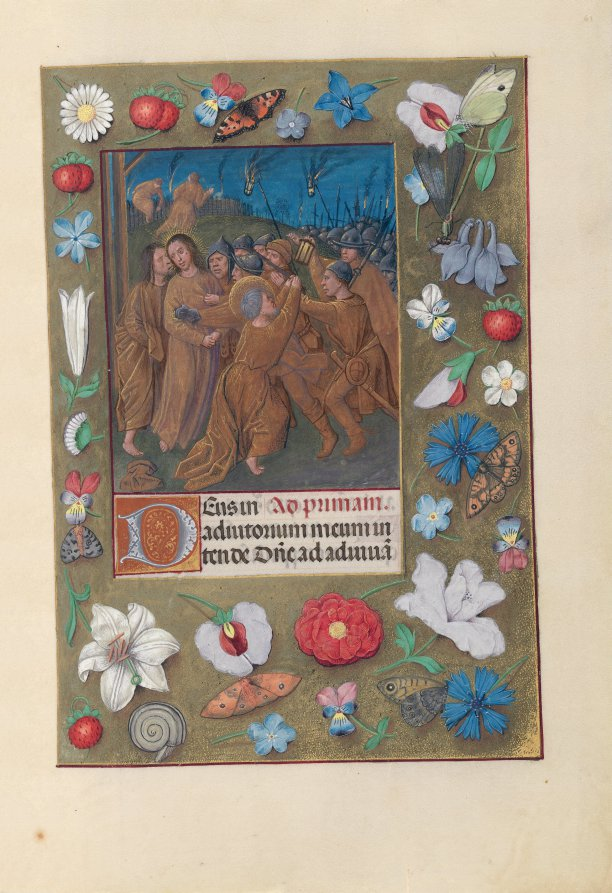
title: Hours of Queen Isabella the Catholic, Queen of Spain: Fol. 61r, Kiss of Judas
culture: Flanders, Ghent and Bruges, late 15th century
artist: Master of the First Prayerbook of Maximillian (Flemish, c. 1444–1519)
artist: and Associates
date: c. 1500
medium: ink, tempera, and gold on vellum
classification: Bound Volume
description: This manuscript was illuminated by a circle of at least five highly organized manuscript painters active in the Flemish cities of Ghent and Bruges. The principal illuminator was Alexander Bening, who painted the majority of the book's miniatures. Manuscripts produced by this circle of artists are renowned for the decoration of their borders, which typically feature a rich variety of realistically-painted flowers, birds, and butterflies. This prayer book, called a book of hours, was intended not for a cleric, but for the private devotions of a lay person-in this case, Isabella the Catholic, Queen of Spain (1451-1504). Isabella's coat of arms embellishes the book's frontispiece. It is unlikely that the book was commissioned by the Queen herself; rather, she probably received it as a diplomatic gift from someone courting her patronage, perhaps Cardinal Francisco Jimenez de Cisneros. A Franciscan friar, Jimenez was dependent upon Isabella for his advancement, first to the post of Queen's confessor in 1492, and then to Archbishop of Toledo in 1495.